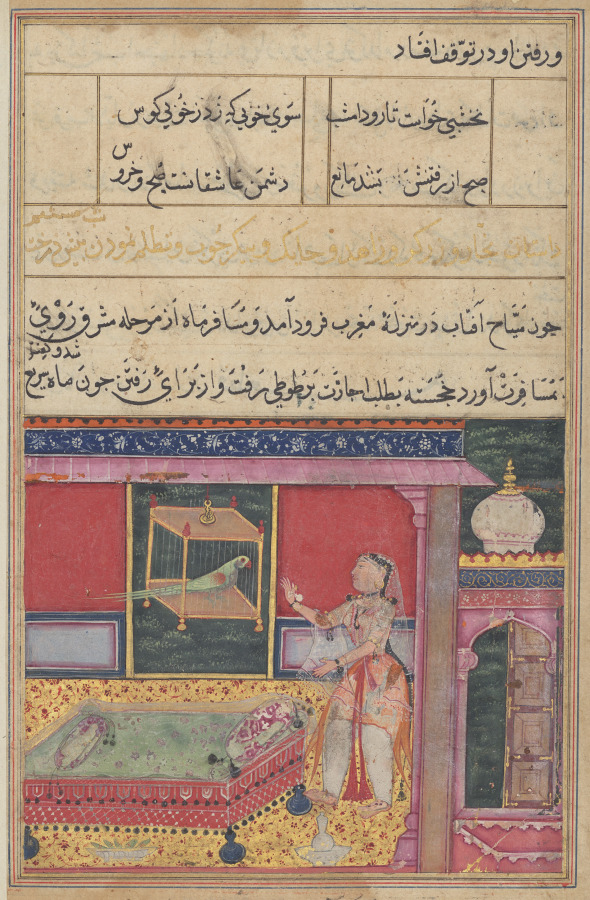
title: The Parrot Addresses Khujasta at the Beginning of the Sixth Night, from a Tuti-nama (Tales of a Parrot)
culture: Mughal India, court of Akbar (reigned 1556–1605)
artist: Dasavanta (Indian)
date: c. 1560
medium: gum tempera, ink, and gold on paper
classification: Painting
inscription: ['amal da]s[wa]nt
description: Tuti the parrot begins to tell Khujasta the story of seven men who became enamored with the statue of a woman that came to life. A Persian inscription in the lower margin attributes this page to the painter Dasavanta. The golden carpet and soft tufts of grass are similar to those found on folio 32v, also attributed to Dasavanta.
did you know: Dasavanta was a mural painter discovered by emperor Akbar, who had him trained in the royal atelier.